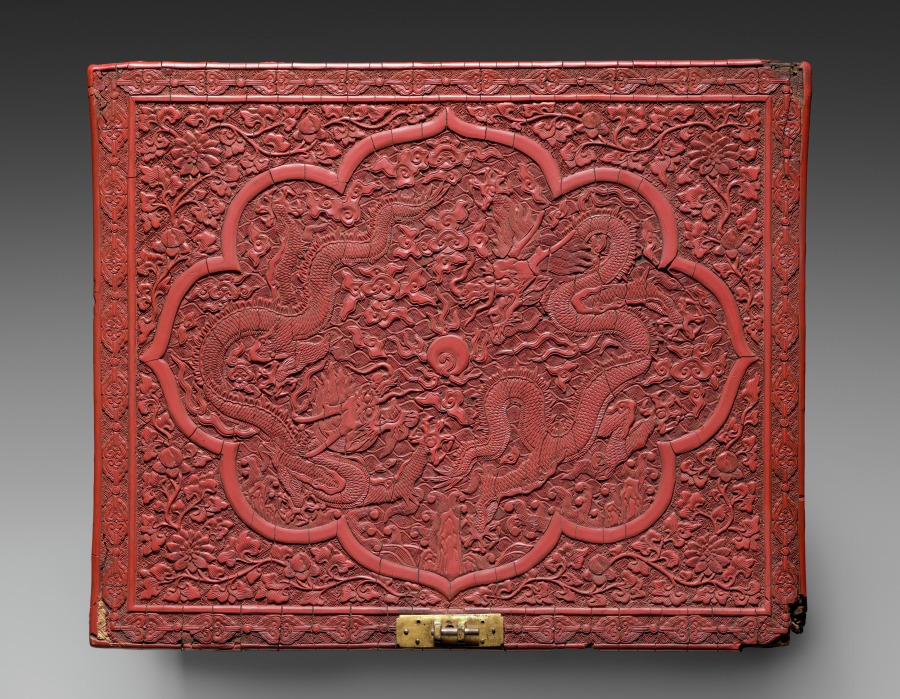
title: Tihong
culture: China, Ming dynasty (1368-1644), Wanli reign (1572-1620)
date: 1585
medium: carved cinnabar lacquer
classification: Lacquer